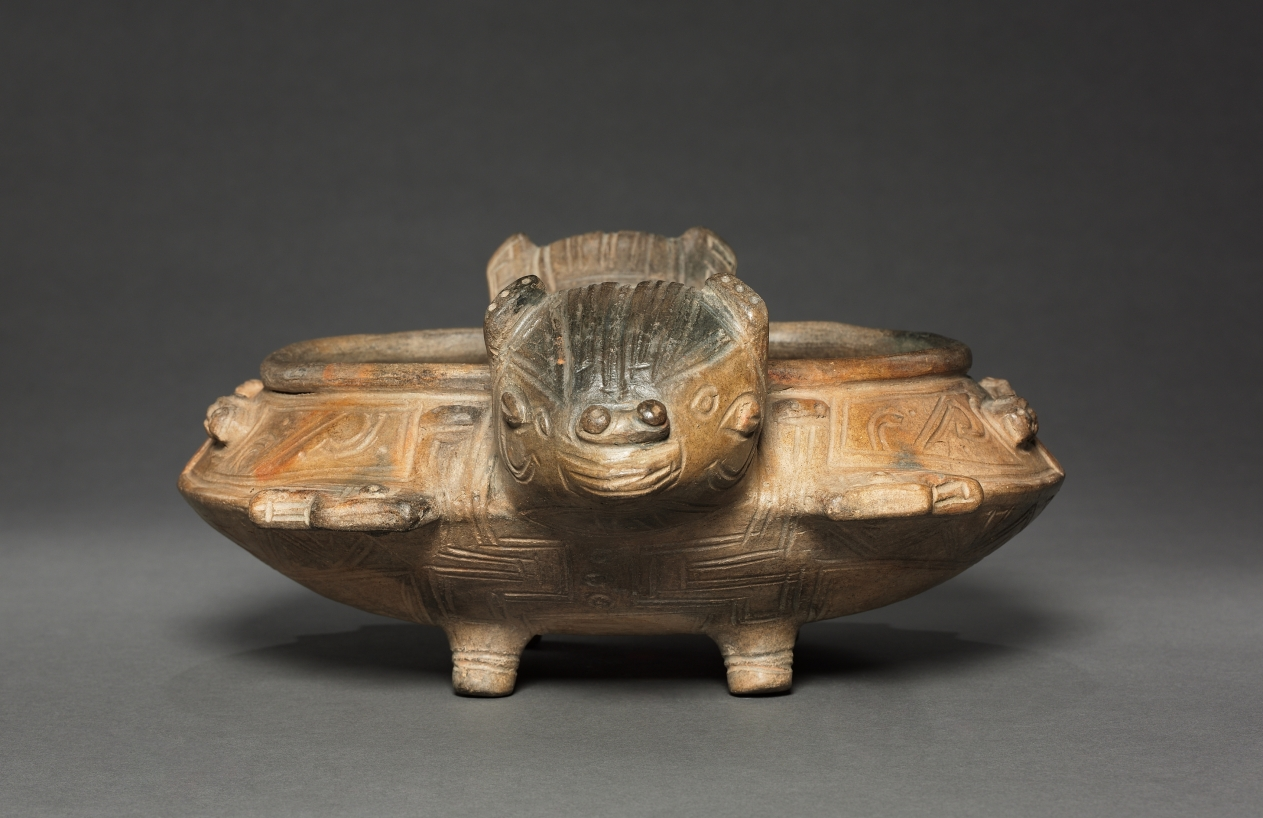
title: Double-Bat Bowl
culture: Colombia, Tairona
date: c. 900–1550 (thermoluminescence date, 810–1310)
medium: earthenware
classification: Ceramic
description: The archaeological Tairona civilization of mountainous northern Colombia is believed to be ancestral to the contemporary Kogi indigenous group. Ancient Tairona sites are terraced, and characterized by circular stone building foundations. The most famous form of Tairona art is gold jewelry, especially lost-wax cast figurines of chiefs, and anthropomorphic bats and birds. Tairona ceramics are less well known. This bowl has two protruding bat heads and four legs. The incurved sides of the bowl to either side of each head represents the bats' wings. The vessel's surface is decorated with raised serpents, as well as incised and impressed patterns.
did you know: The Tairona civilization lived in the mountains of northern Colombia.